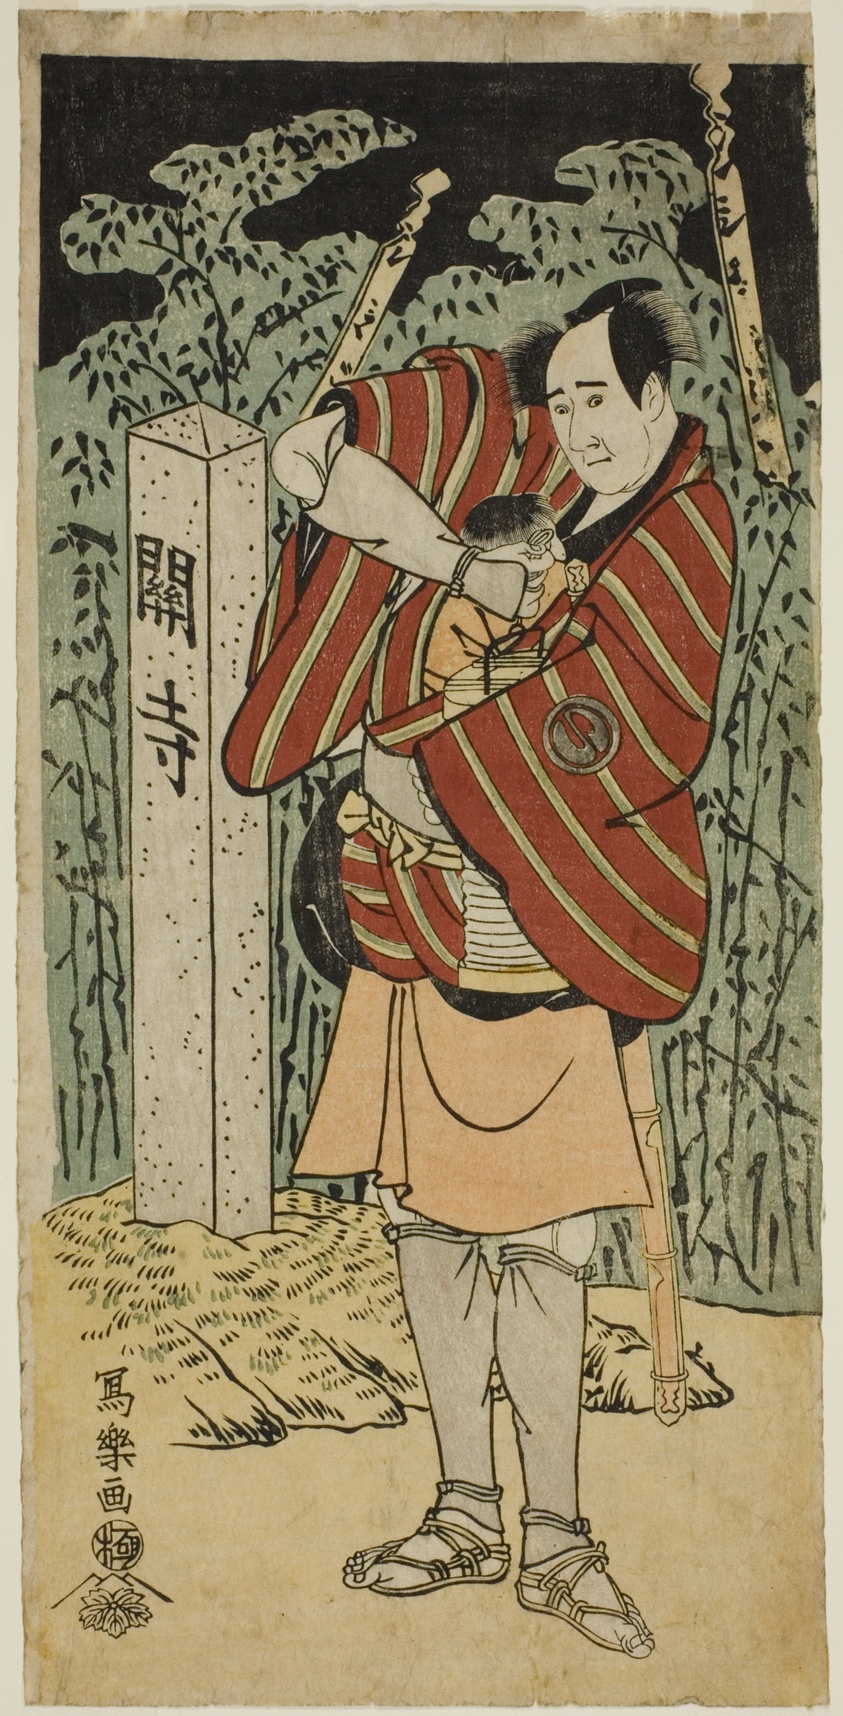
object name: Print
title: The actor Sawamura Sojuro III as Kujaku Saburo Narihira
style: Japanese (culture or style)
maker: Toshusai Sharaku 東洲斎 写楽; Japanese, active 1794-95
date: 1794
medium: Color woodblock print; left sheet of hosoban diptych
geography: Japan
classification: woodblock print; print; asian art